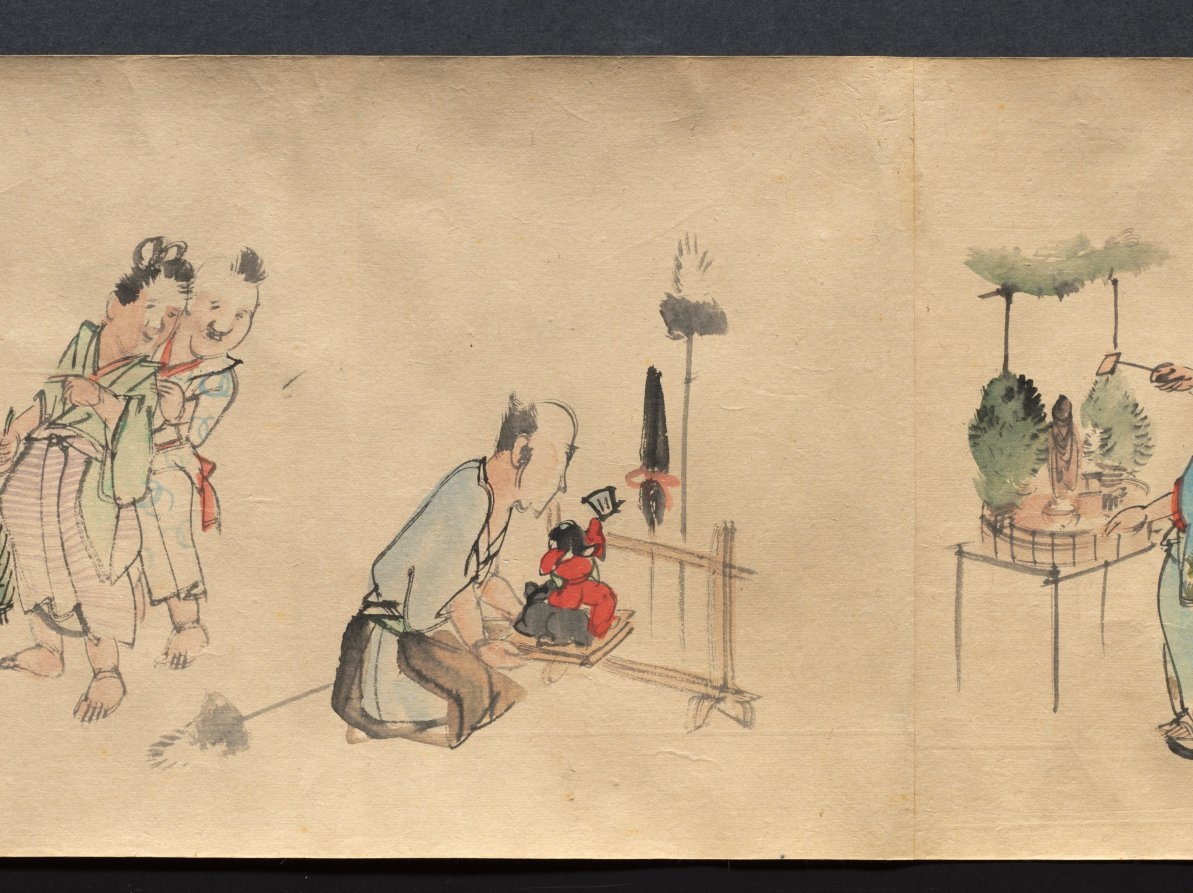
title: Festival Scenes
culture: Japan, Edo period (1615–1868)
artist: Suzuki Nanrei (Japanese, 1775–1844)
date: c. 1795–1844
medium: handscroll; ink and color on paper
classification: Painting